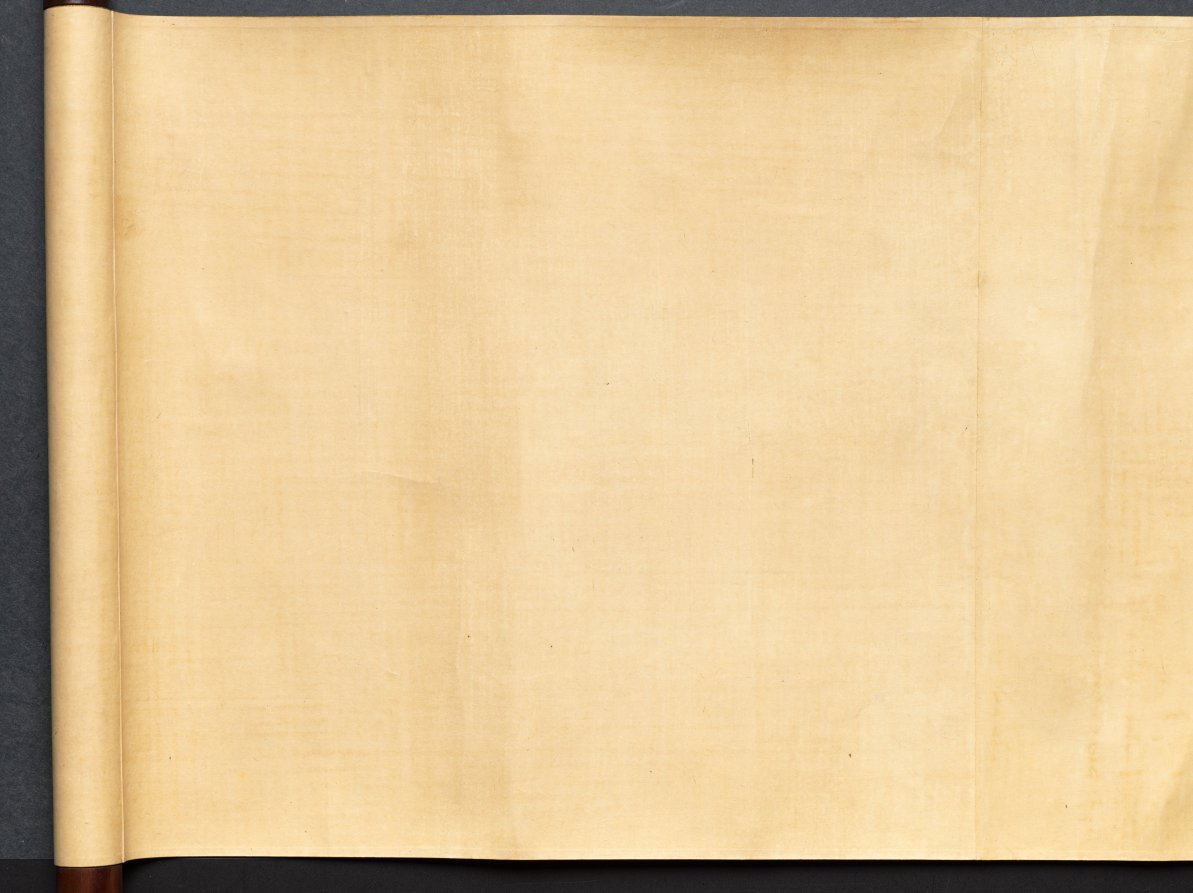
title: People Fleeing from a Fire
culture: Japan, Edo period (1615–1868)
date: 1615–1868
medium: Handscroll; color and gold on paper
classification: Painting